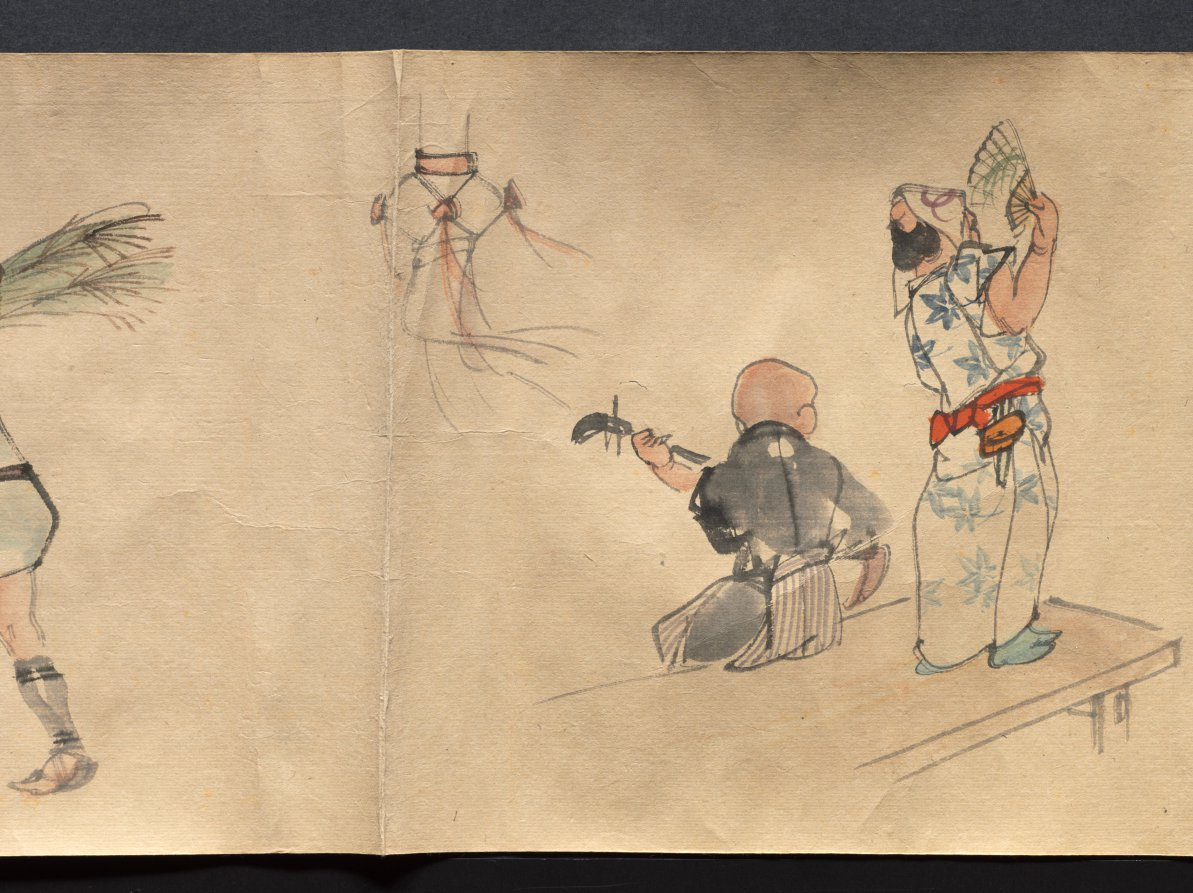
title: Festival Scenes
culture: Japan, Edo period (1615–1868)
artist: Suzuki Nanrei (Japanese, 1775–1844)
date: c. 1795–1844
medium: handscroll; ink and color on paper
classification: Painting